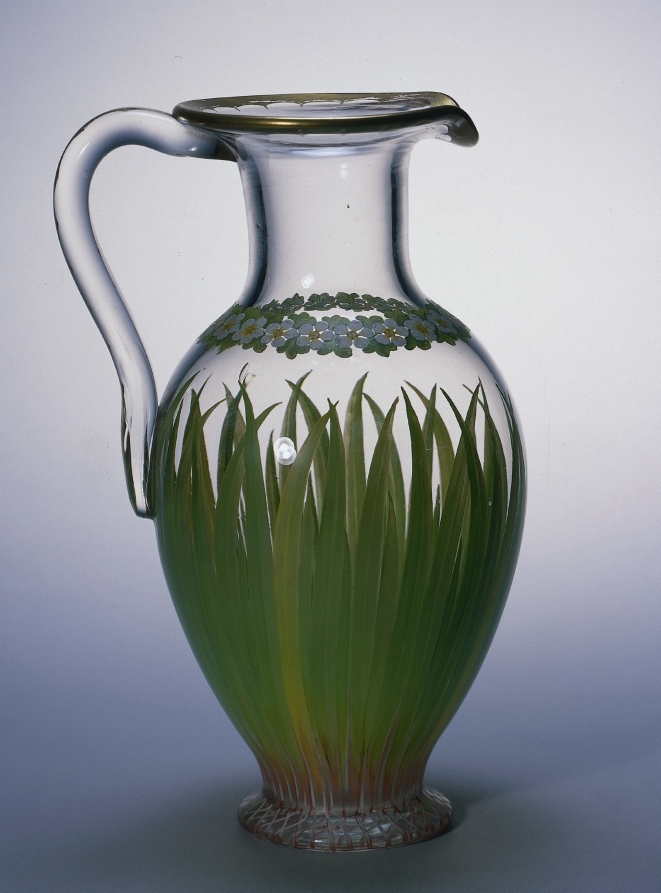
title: Jug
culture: England, 19th century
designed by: Richard Redgrave (British, 1804–1888)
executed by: J. F. Christy, Stangate Glass Works (British)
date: 1847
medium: glass, enamel decoration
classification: Glass